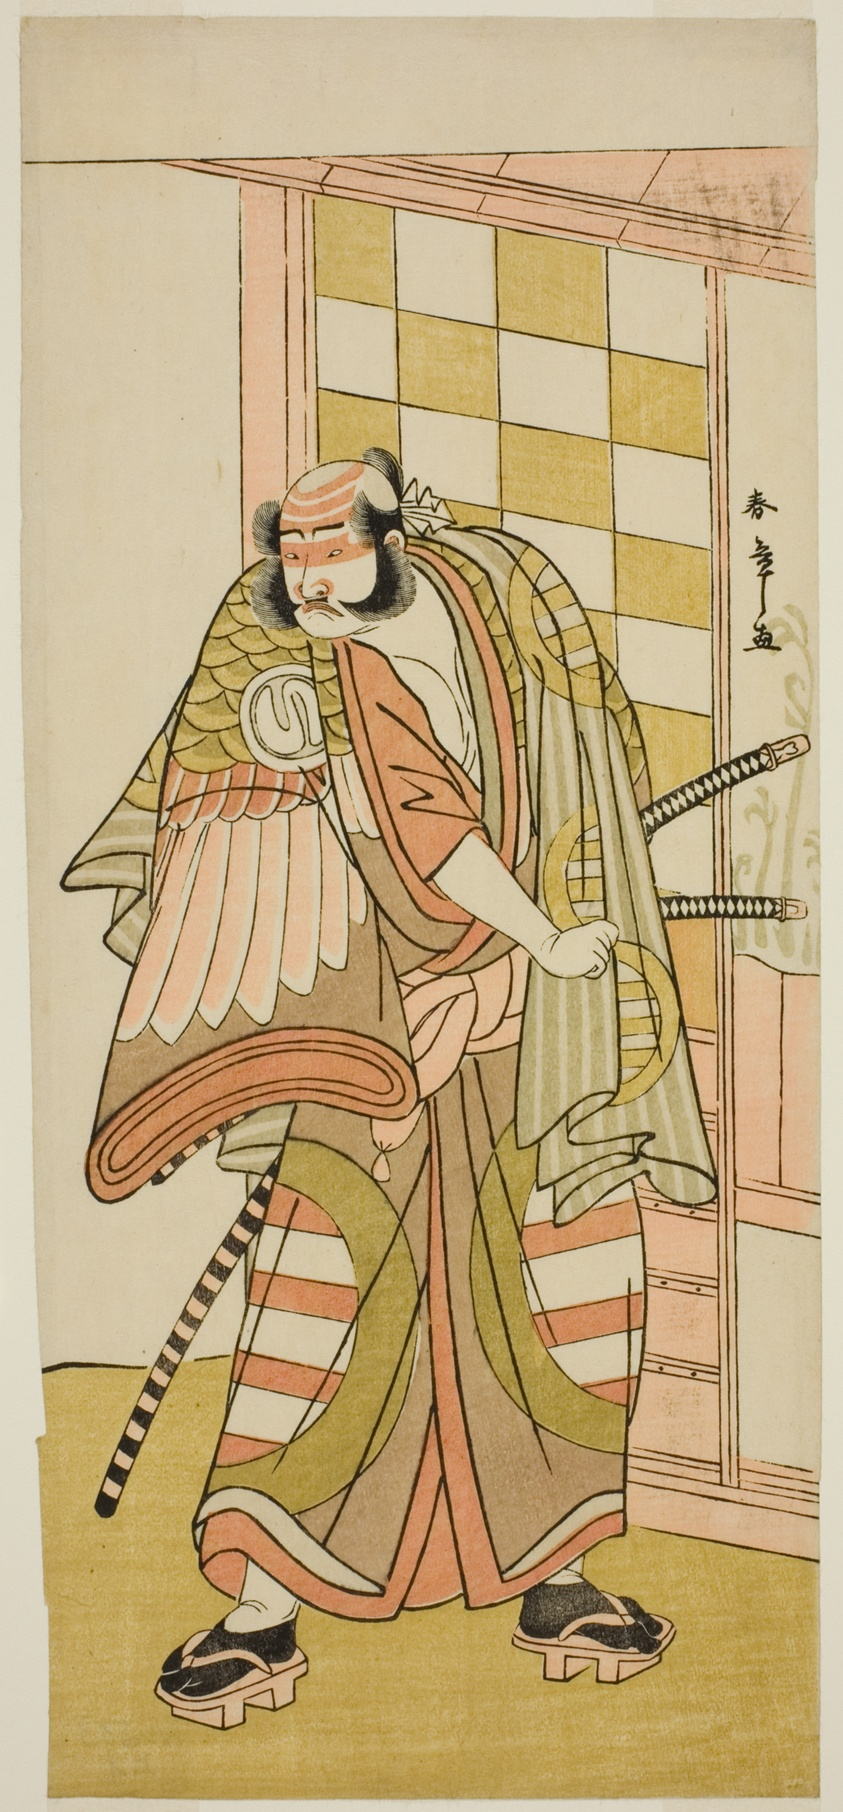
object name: Print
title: The Actor Sawamura Sojuro III as Kobayashi no Asahina Saburo in the Play Kuruwagayoi Komachi Soga, Performed at the Nakamura Theater in the Second Month, 1781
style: Japanese (culture or style)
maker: Katsukawa Shunsho 勝川 春章; Japanese, 1726-1792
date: c. 1781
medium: Color woodblock print; hosoban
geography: Japan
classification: woodblock print; print; asian art